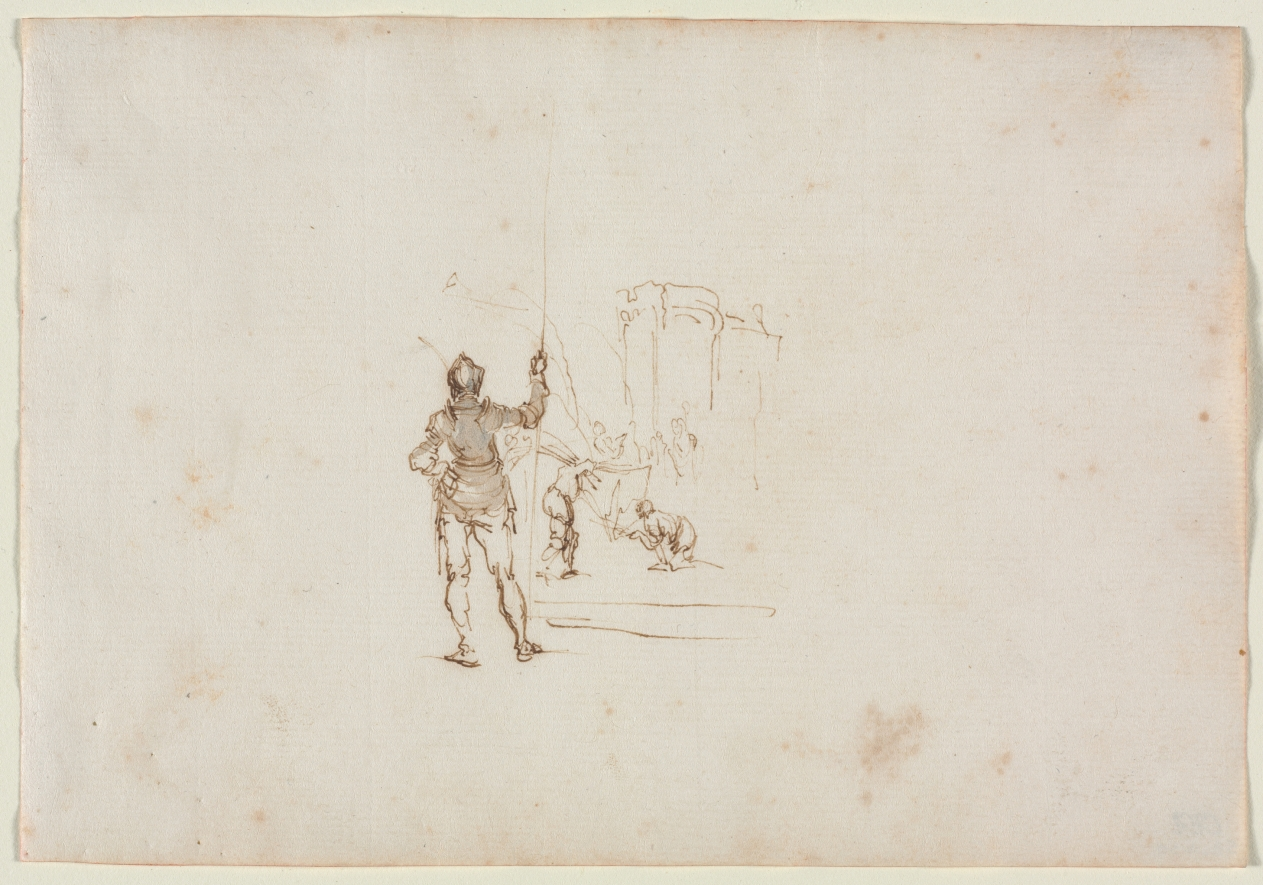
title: Detail of Martyrdom of Saint John the Evangelist, after Callot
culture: Italy, 17th century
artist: Stefano Della Bella (Italian, 1610–1664)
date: after 1634?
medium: pen and brown ink with brush and brown wash over black chalk (upper portion of soldier's armor)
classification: Drawing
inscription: OLD MOUNT (now removed), lower left, in graphite: Nr. 2 / Jaques Callot 1592-1635